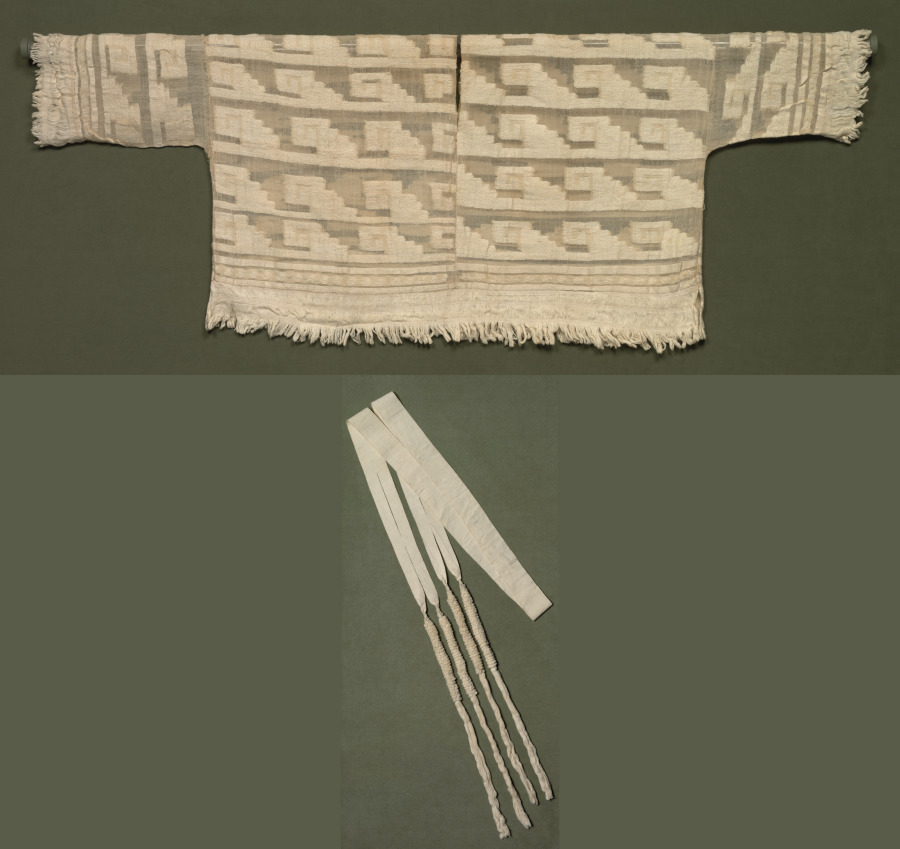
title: Tunic and Band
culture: Peru, Chimú or Chimú-Inka, 12th-16th century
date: 1100–1532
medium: white cotton; plain weave with supplementary weft brocading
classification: Textile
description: Although these garments are similar in appearance and technical features, it is not clear that they were found or used together. To see the record for each, click “see all set records,” above.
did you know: The Chimú forged an empire that thrived until the 1460s, when the Inka incorporated it into their own imperial domain.